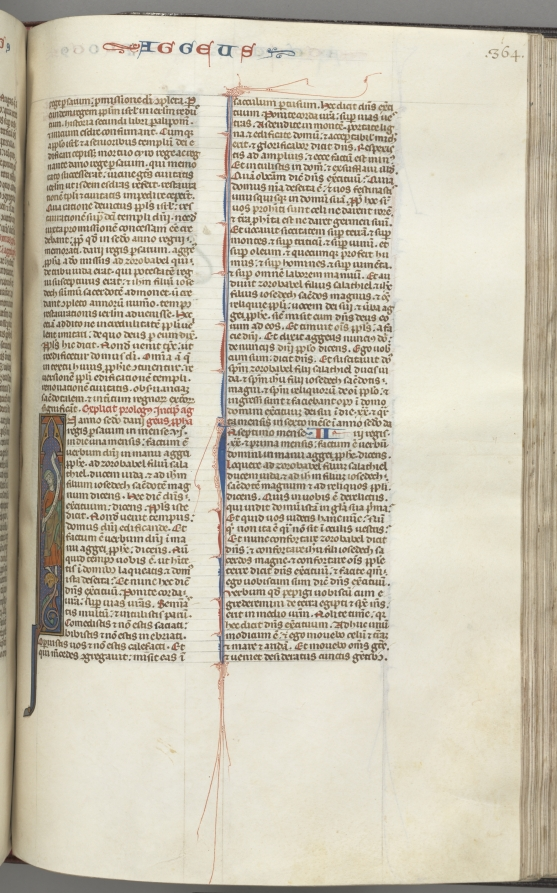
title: Fol. 364r, Haggai, historiated initial I, Haggai with a scroll standing on a hybrid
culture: Southern France, Toulouse(?), 13th century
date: c. 1275–1300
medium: ink, tempera and gold on vellum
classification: Bound Volume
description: Biblical manuscripts were highly prized and important possessions of churches, monasteries, cathedral schools, and universities throughout medieval Europe. The biblical texts were known as the vulgate, the translations made by Saint Jerome in the fourth century from Hebrew and Greek into Latin, which became the definitive and official Latin version of the Roman Church. In the 13th century, the bible was, for the first time, produced as a single volume with an officially sanctioned sequence to its books and chapters as illustrated by this example. The very extensive decoration of this bible is arranged hierarchically to indicate the relative importance of the various texts so that full or almost full-page initials mark the openings of the first prologue, Genesis, and the first Gospel; historiated initials mark the beginning of each book and illuminated initials mark the Prologues.